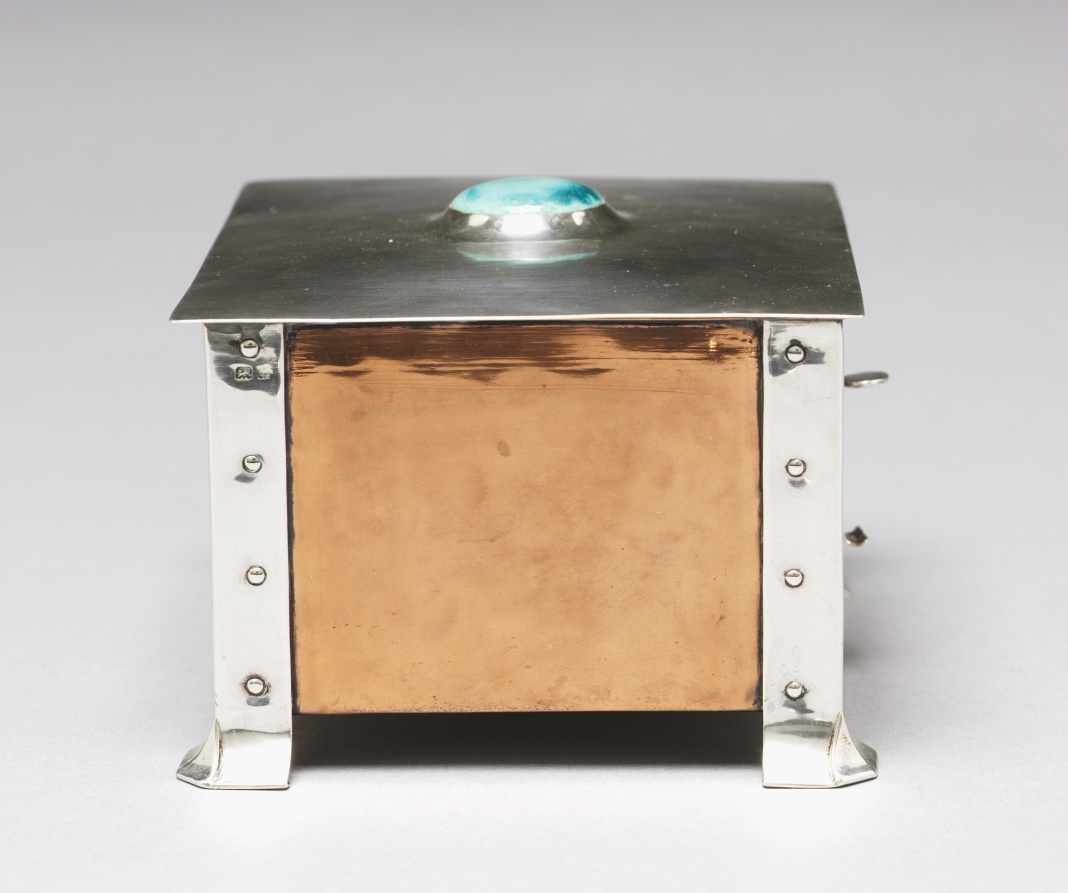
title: Covered Box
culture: England, Birmingham, early 20th Century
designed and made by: A. Edward Jones (British, 1878–1954)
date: 1903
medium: silver, copper, ceramic with wood lining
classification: Metalwork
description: British designer Albert Edward Jones founded A. Edward Jones in 1902, an Arts and Crafts metalworking firm that primarily produced ecclesiastical and domestic objects at the time of this box's creation. The box combines silver and copper metalwork, sleekly designed with limited embellishment.